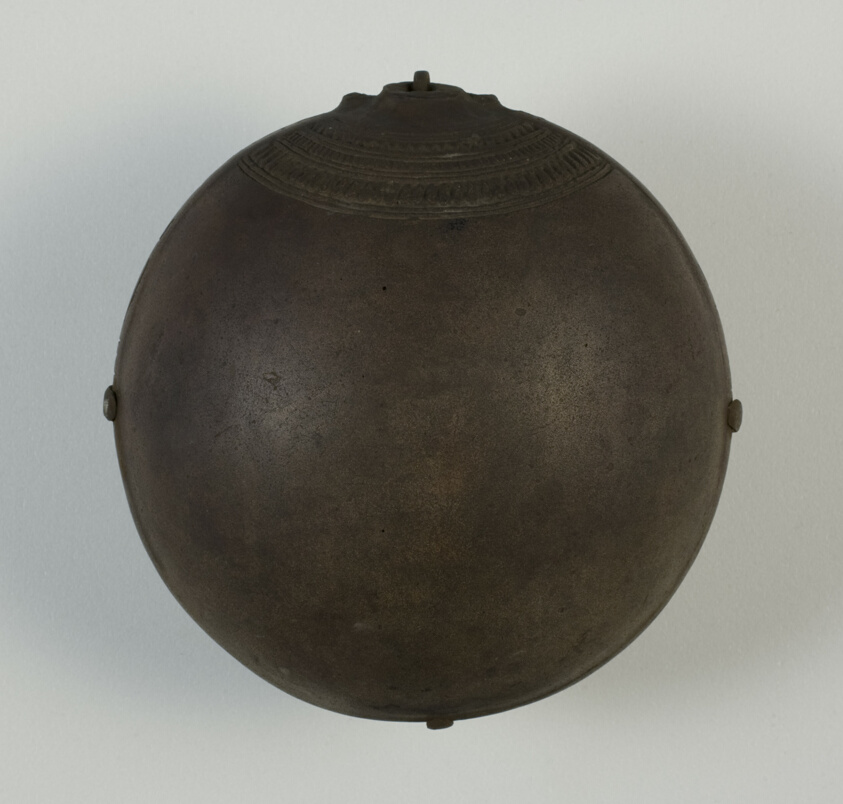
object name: Vessel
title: New Year's Flask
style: late period (egyptian), greco-roman (egyptian), twenty-sixth dynasty, egyptian, ancient, saite period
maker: Egyptian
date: Late Period, Dynasty 26 (664–525 BCE)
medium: Faience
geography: Egypt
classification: flask (bottle); bottle; ceramics; vessel; ancient art; faïence (composite material)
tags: Hieroglyphs